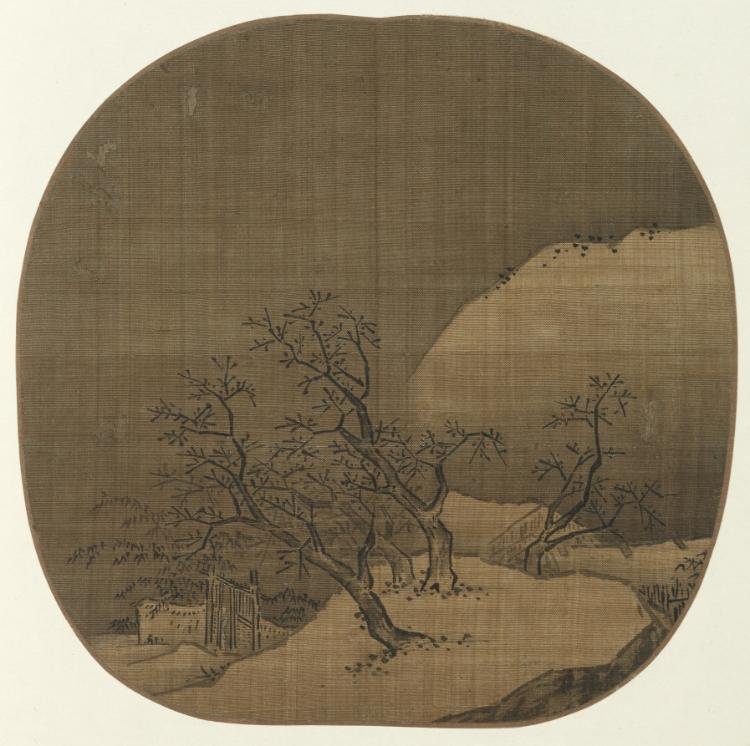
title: Winter Scene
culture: China, Song dynasty (960-1279)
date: 960–1279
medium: album leaf, ink on silk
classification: Painting